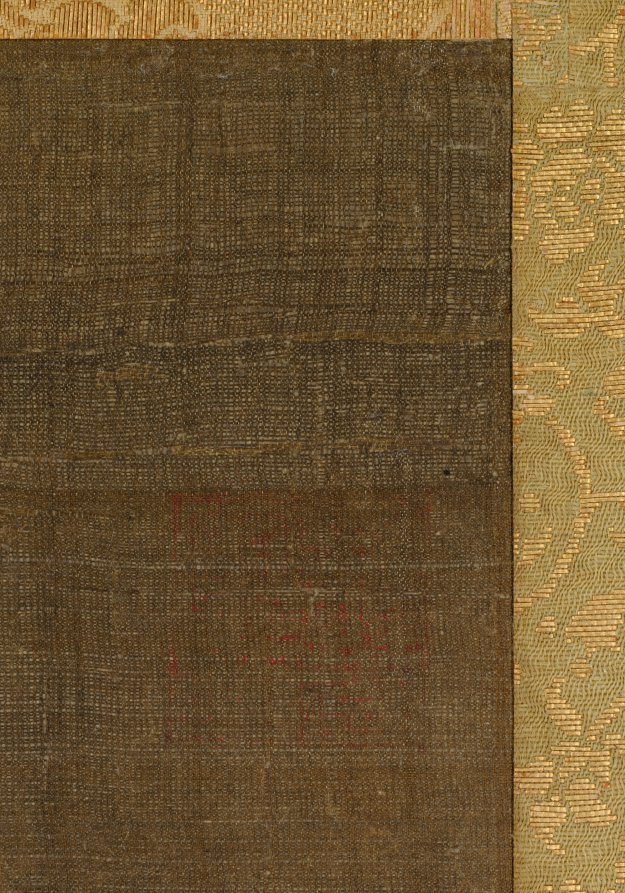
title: Tiger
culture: China, Southern Song dynasty (1127-1279)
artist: Fachang Muqi (Chinese, 1220–1280)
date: c. 1250–79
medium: Hanging scroll; ink and slight color on silk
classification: Painting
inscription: 道有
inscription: 雜華室印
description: The dragon and tiger are tied to the philosophical concept of yin and yang, which describes opposite but complementary forces. The dragon occupies a tiered background of waves and mist. Its luminous head emerges from the darker passages, and its narrow twisting body is serpent-like. By contrast, the close-up view of the tiger emphasizes its bulk. The tiger bends its head to lick its paw while its tail curls in the foreground. In their original Chan Buddhist context, this pair of scrolls likely flanked a central image, like the Bodhisattva Guanyin. The silk has darkened over the centuries, and the slight reddish shading in the tiger’s tongue and nose has faded.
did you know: Fachang Muqi's ink paintings, like this pair, were highly appreciated and collected in Japan.